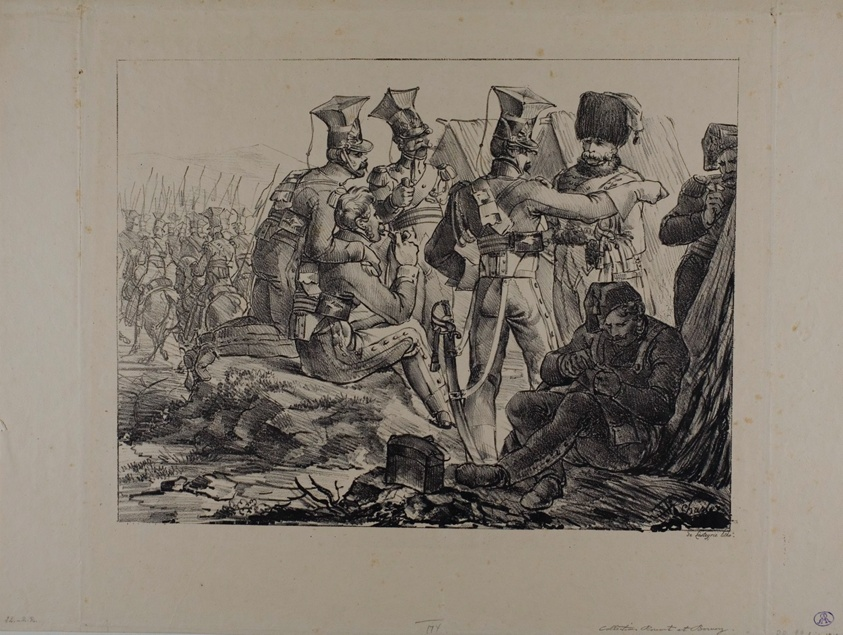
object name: Print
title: Lancers on Bivouac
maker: Nicolas Toussaint Charlet (French, 1792-1845)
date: 1818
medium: Lithograph in black on ivory wove paper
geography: France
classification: lithograph; print; prints and drawing